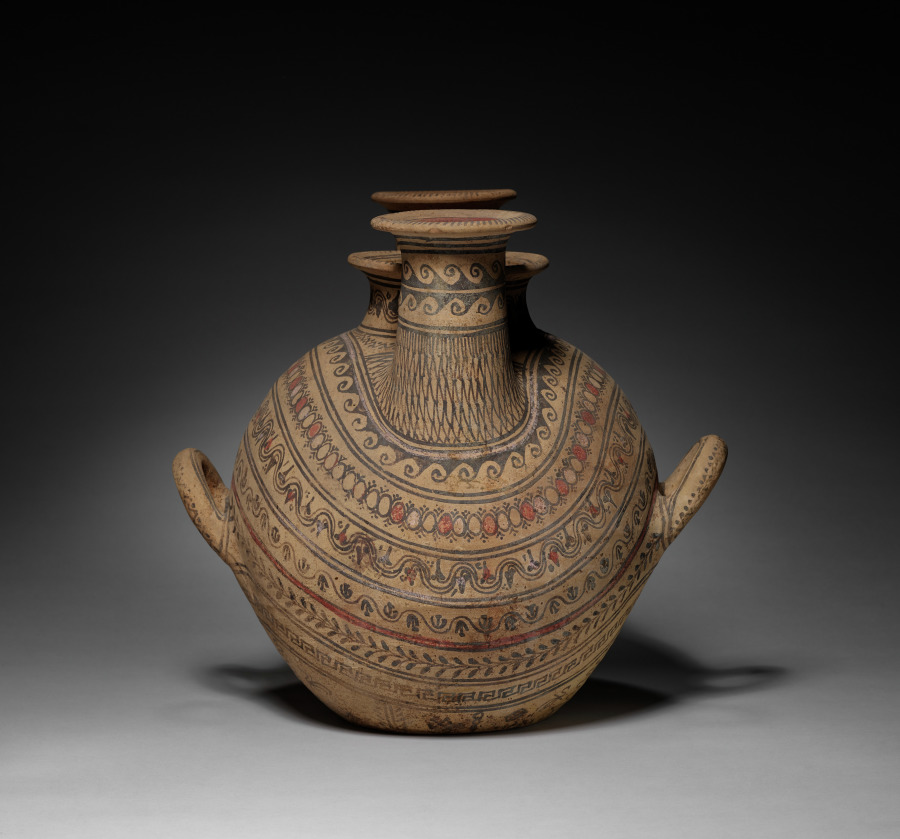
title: Two-Spouted Strainer Askos (Flask)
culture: South Italian, Daunian or Canosan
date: 300–200 BCE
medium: ceramic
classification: Ceramic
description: Although now referred to by the Greek term askos, because of its resemblance to the animal skins used to hold wine in ancient Greece, this ceramic shape developed in the South Italian region of Daunia (north of Apulia, on the Adriatic coast). This example is unusual for its three openings—one covered by a lid, the others spouted with built-in strainers. Its profusely painted decoration, mostly geometric and vegetal patterns applied in black with added red and white, is arranged in bands that follow the contours of the vessel.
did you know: Each spout has a built-in strainer—one near the top, the other near the bottom.